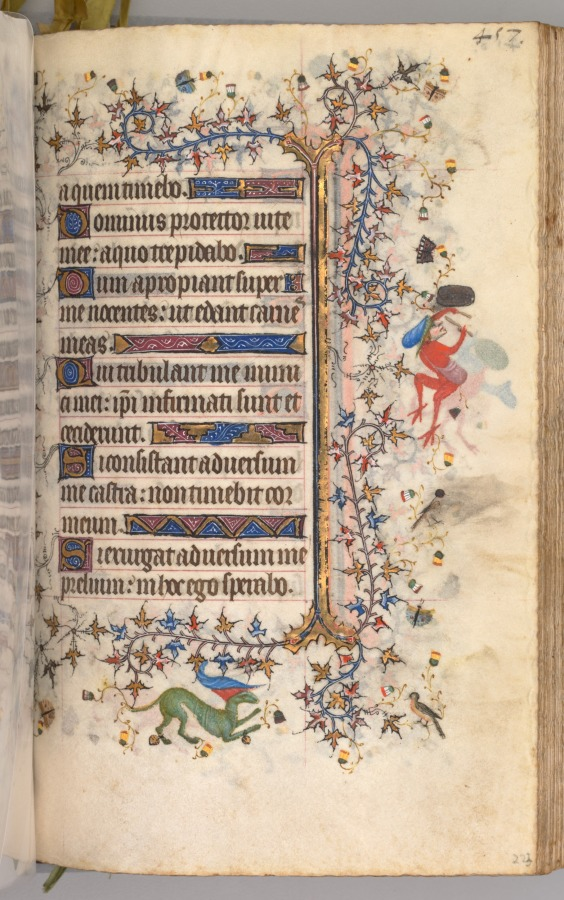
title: Hours of Charles the Noble, King of Navarre (1361-1425): fol. 223r, Text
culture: France, Paris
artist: Master of the Brussels Initials and Associates (French)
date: c. 1405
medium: ink, tempera, and gold on vellum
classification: Bound Volume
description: This precious volume was obviously highly prized by its owner, the French-born King of Navarre, who had his coat of arms painted on no less than twenty folios. Rather than directly commissioning this manuscript from a specific workshop, it seems that Charles the Noble acquired his book of hours -- perhaps ready-made for the luxury market -- while on a trip to Paris in 1404-05. A collaborative effort, six painting styles are evidenced within the pages of this codex, those of two Italians, two Frenchmen, and two Netherlanders. The painter who was responsible for the planning and decoration of the book, and who produced seventeen of the large miniatures, was a Bolognese artist known as the Master of the Brussels Initials. His principal assistant, responsible for most of the borders, was a Florentine who signed his name "Zecho" da Firenze on folio 208 verso.